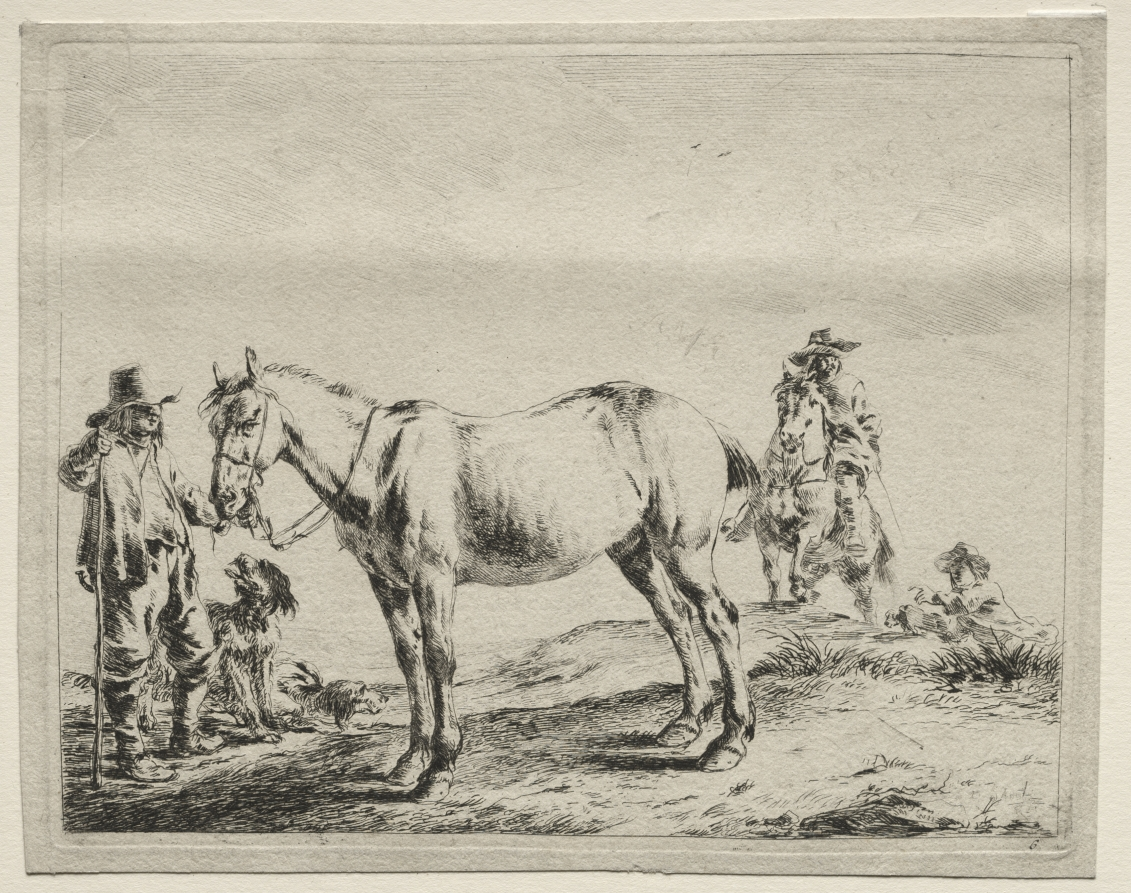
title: Man holding a horse by the bridle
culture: Netherlands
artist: Dirck Stoop (Dutch, c. 1618–1681)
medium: etching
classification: Print